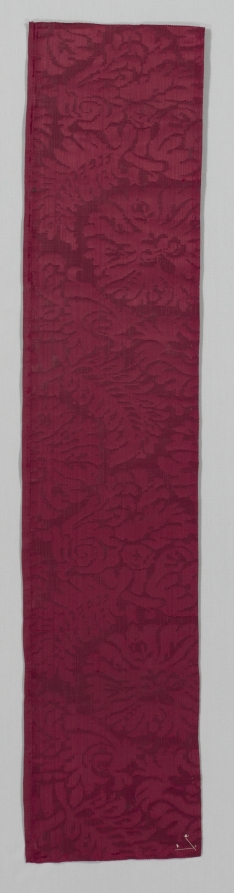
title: Fragment of Silk Damask Textile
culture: Italy, late 17th century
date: late 1600s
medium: damask, silk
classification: Textile